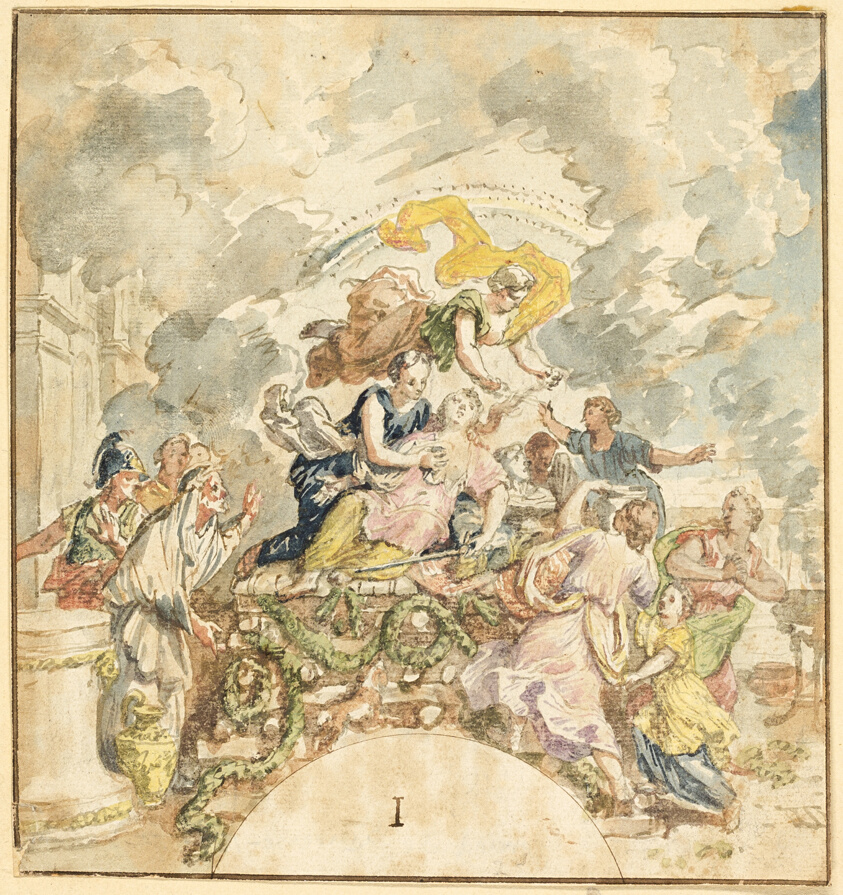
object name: Drawing and Watercolor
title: The Death of Dido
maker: School of Gerard de Lairesse (Flemish, 1640-1711)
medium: Watercolor, over traces of graphite, on ivory laid paper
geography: Flanders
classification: watercolor; drawings (visual works); prints and drawing